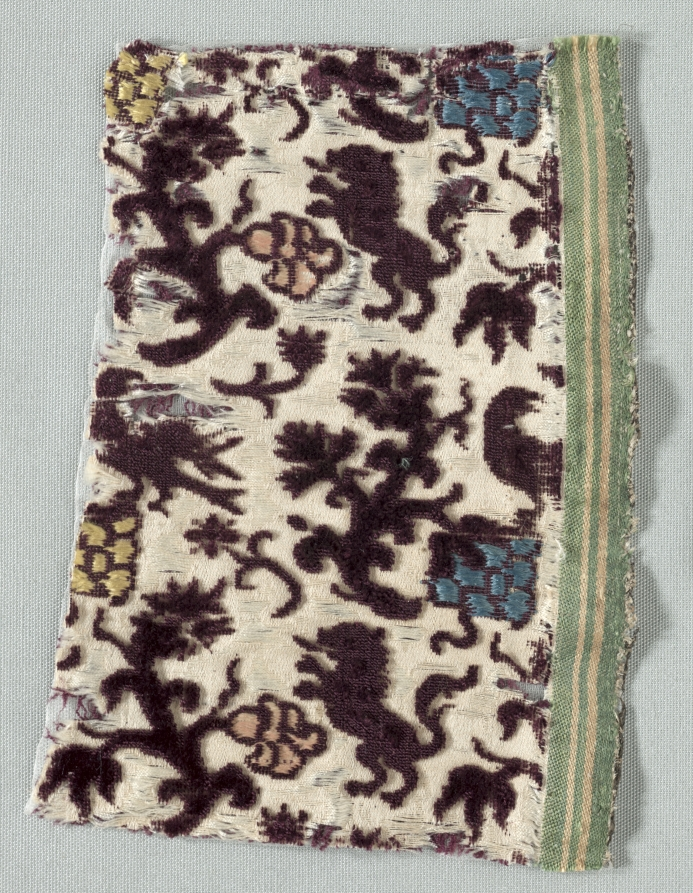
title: Velvet Fragment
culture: Italy, 17th century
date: 1600s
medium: velvet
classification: Velvet